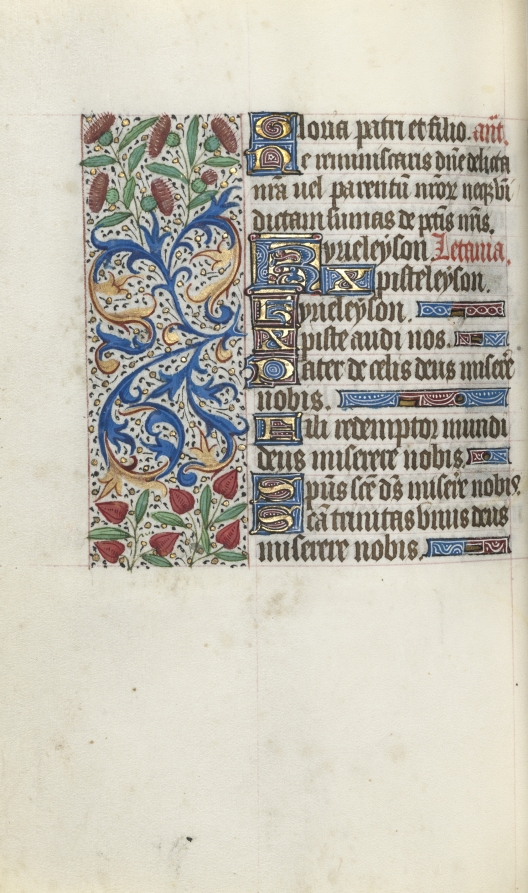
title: Book of Hours (Use of Rouen): fol. 92v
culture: France, Rouen, 15th century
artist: Master of the Geneva Latini (French, active Rouen, 1460–80)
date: c. 1470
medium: ink, tempera, and gold on vellum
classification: Bound Volume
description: In the late 1400s and early 1500s Rouen was an established and important center of book production. The city’s cathedral had a wealthy chapter that spent large sums of money to commission books and to maintain its extensive library. The stationers and booksellers would have likely been concentrated in or near the cathedral precinct. This artist, named after a manuscript now in Geneva, was Rouen’s principal illuminator during the second half of the 1400s.